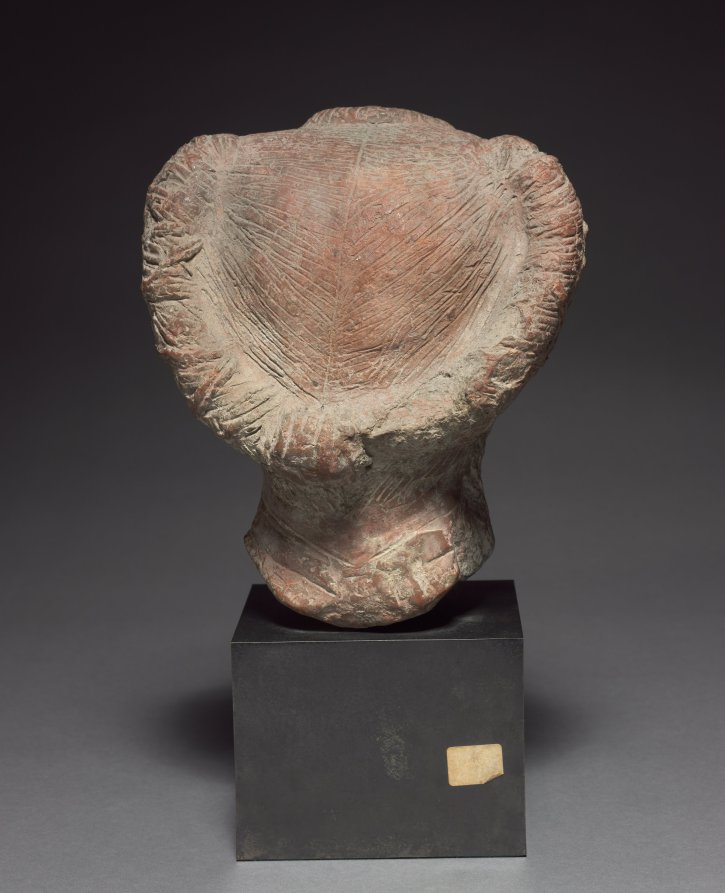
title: Female Head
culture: India, Gangetic plain region, Gupta period, 5th-6th centuries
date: 400s–500s CE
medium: terracotta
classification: Stone